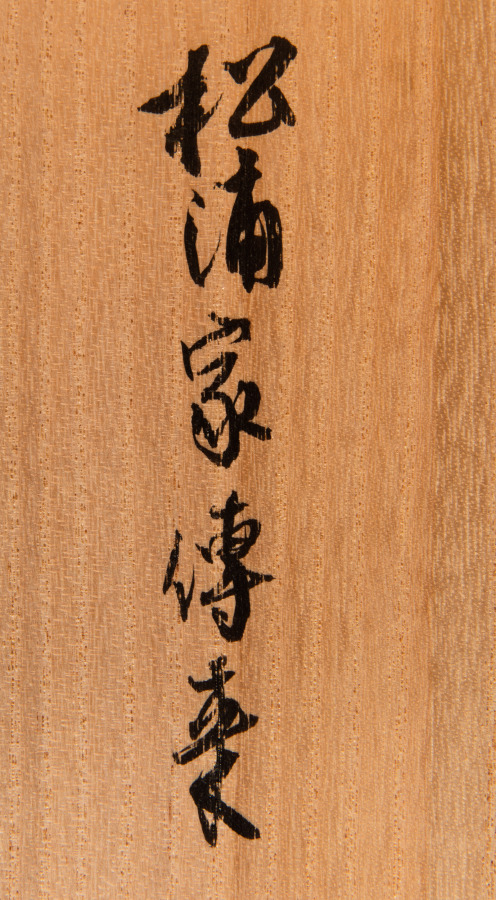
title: Reeds and Geese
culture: Japan, Kamakura period (1185–1333)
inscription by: Yishan Yining [Issan Ichinei] (Chinese, 1247–1317)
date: 1314–17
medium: hanging scroll; ink on paper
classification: Painting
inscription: signed: Issan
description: Reeds and geese has been a common pairing in Chinese literary and visual culture for many centuries. This painting presents the contribution of a Japanese amateur painter, almost certainly a Zen Buddhist monk, to Japan’s fledgling efforts to add the theme to its own cultural vocabulary in the early 1300s. As was customary at the time in Japan, the painter did not sign or seal his work; the inscription, a poem added to the painting by the eminent émigré monk Yishan Yining, along with his signature and seal, was of far greater cultural value. Today, the modestly sized painting has tremendous significance as one of the earliest surviving examples of Japanese ink paintings with reeds and geese.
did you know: Tokyo National Museum owns a copy of this painting made by Kano Gyokusen (1796–1864) when he was 14 years old.